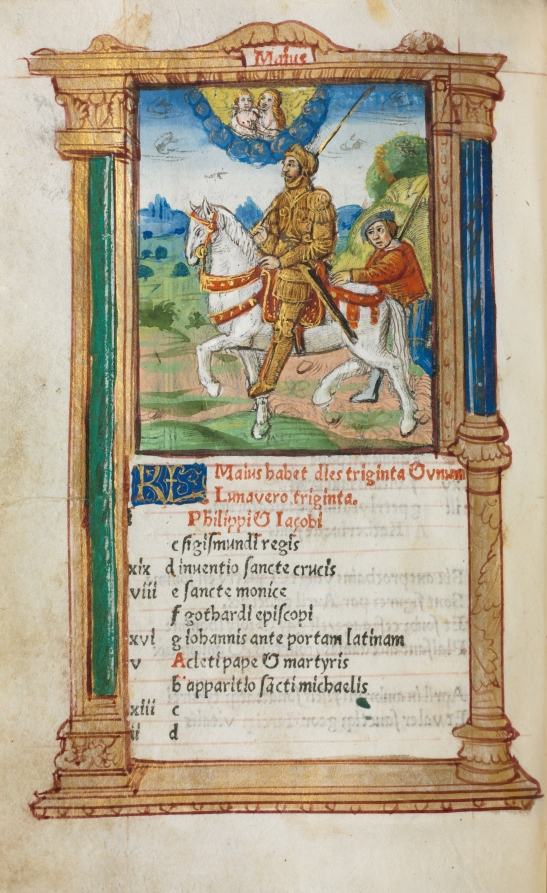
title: Printed Book of Hours (Use of Rome): fol. 6v, May calendar illustration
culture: France, Paris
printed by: Guillaume Le Rouge (French, Paris, active 1493–1517)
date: 1510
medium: 112 Printed folios on parchment, bound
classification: Bound Volume